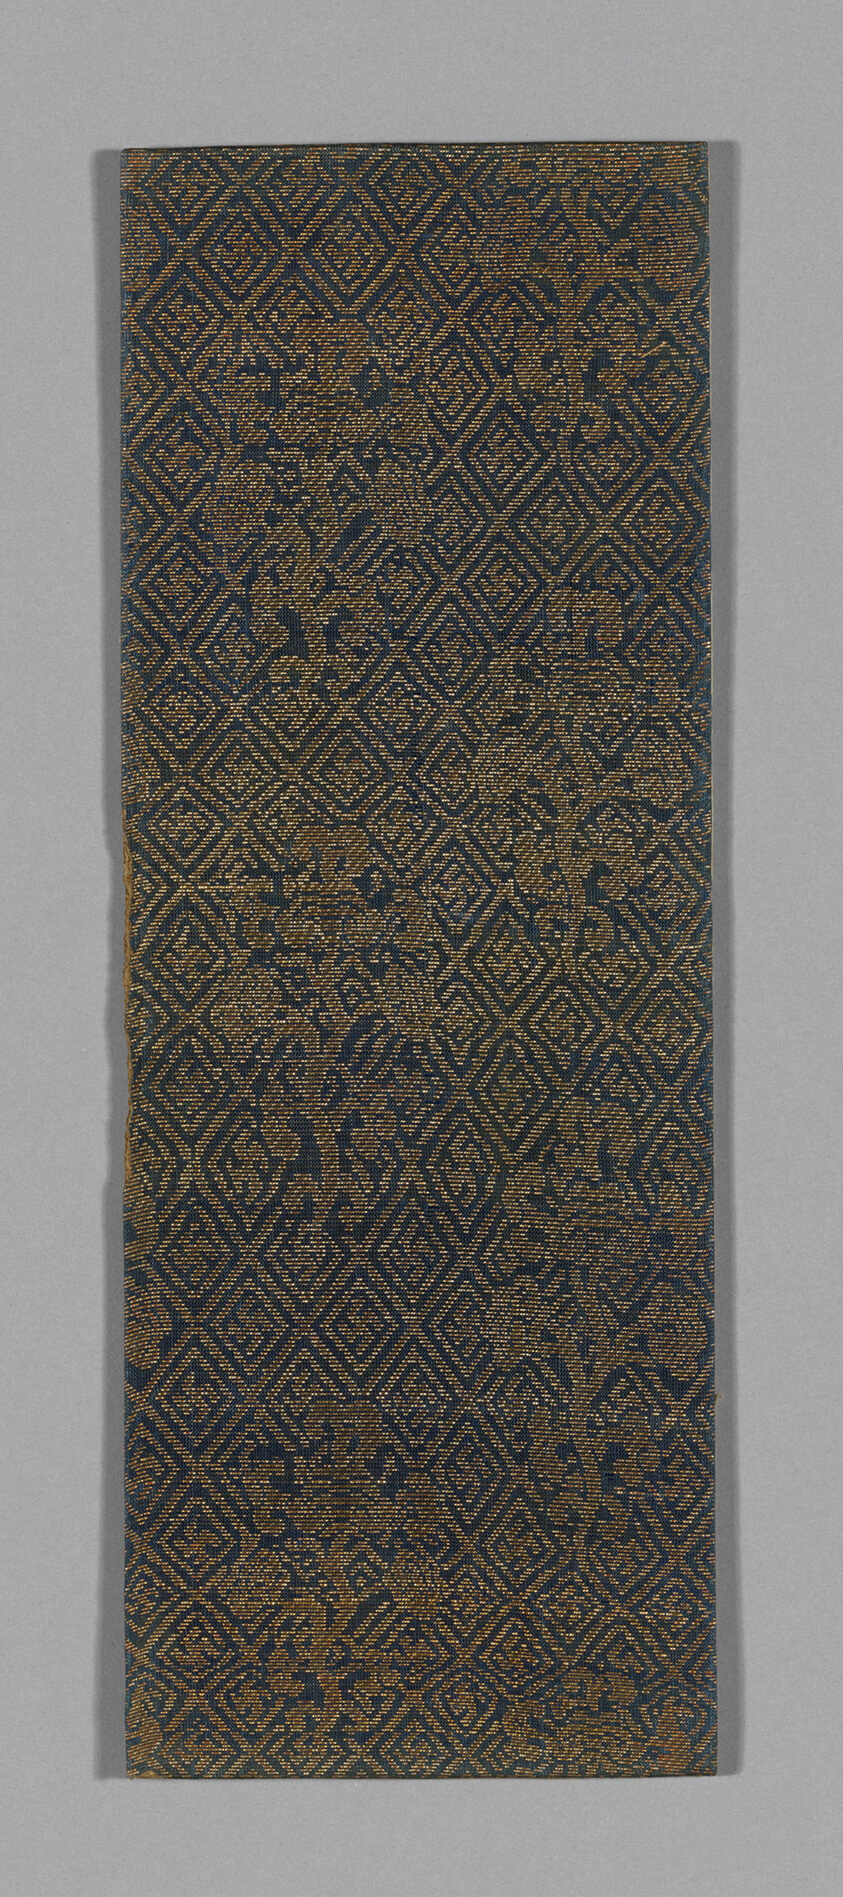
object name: Textile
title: Sutra Cover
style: ming, Chinese (culture or style), East Asian, asian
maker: China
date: Ming dynasty (1368–1644), c. 1590's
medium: Silk and gold-leaf-over-lacquered-paper strips, plain weave with supplementary patterning wefts bound in weft-float faced 1:2 'Z' twill interlacings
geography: China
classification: textile; weaving